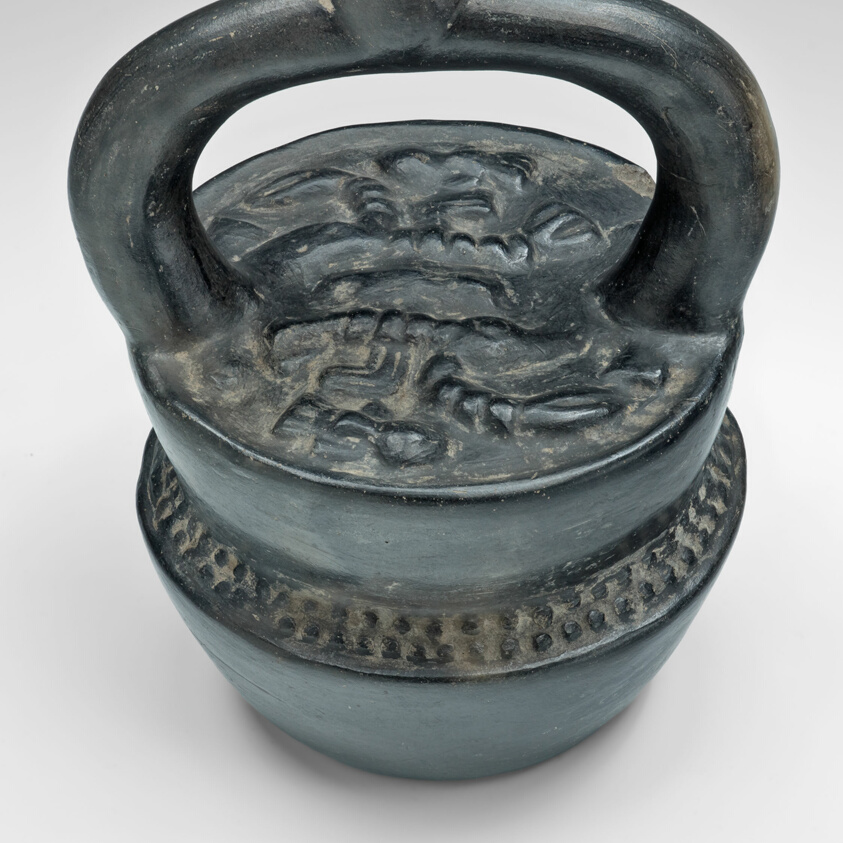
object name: Vessel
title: Stirrup Spout Vessel in Form of Stacked Bowls of Food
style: moche, Arts of the Americas, andes, south american, andean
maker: Moche (North coast, Peru)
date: 100 BCE–500 CE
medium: Ceramic and pigment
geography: Peruvian North Coast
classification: blackware (black basaltes); earthenware; ceramics; vessel; art of the americas